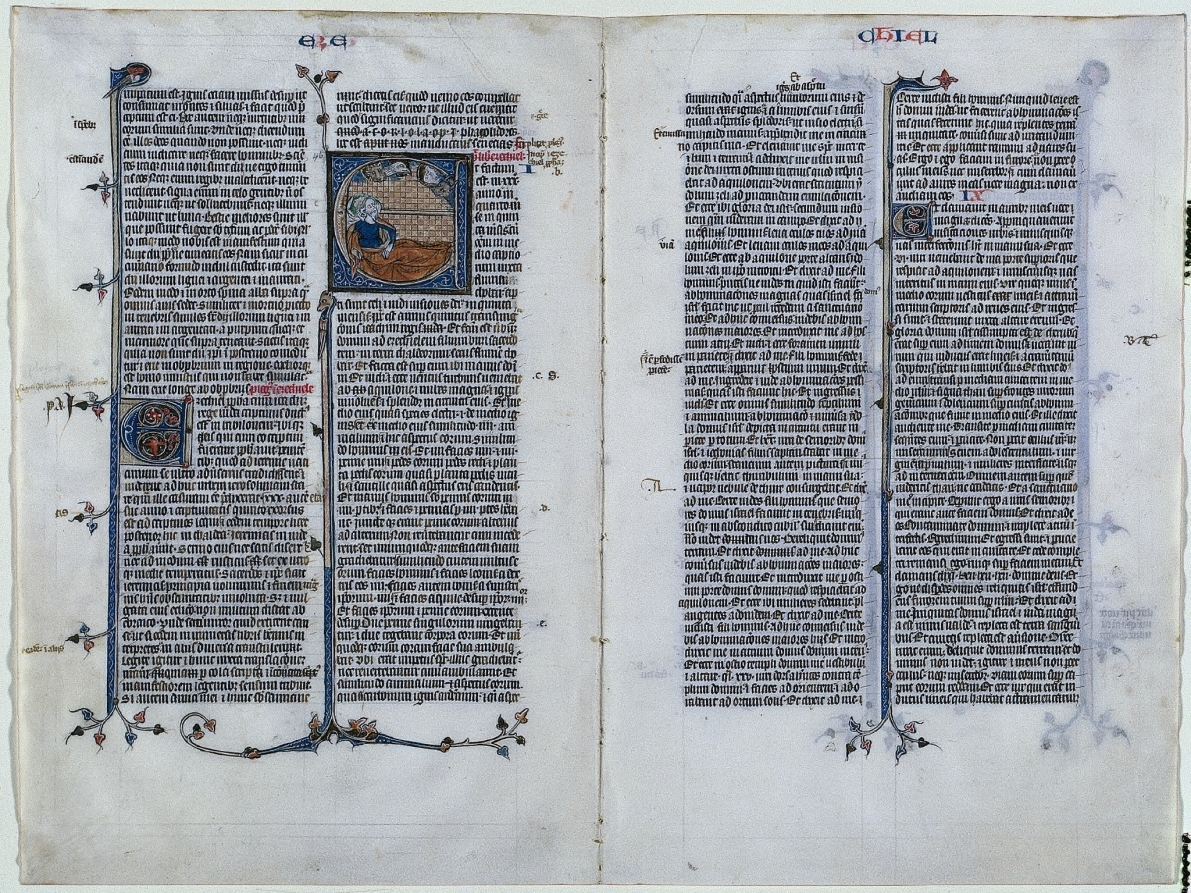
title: Bifolium from a Bible: Initial E[t factum est] with Ezekiel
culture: France, Paris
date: c. 1290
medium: ink, tempera, and gold on vellum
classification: Manuscript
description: This large initial E on the left page introduces the Book of Ezekiel. The prophet is represented in the midst of his apocalyptic visions. Ezekiel's call to prophecy began as a vision showing God enthroned among four creatures, each with four wings and the face of a man, lion, ox, and eagle, respectively. These apocalyptic beasts recur in the Book of Revelation and were developed by the medieval Church into symbols of the Evangelists: Matthew, Mark, Luke, and John. Since medieval manuscripts were not paginated, this large initial provided a clear visual cue for the reader to help locate the text of Ezekiel within the manuscript.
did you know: This bifolium was likely once part of a Carthusian Bible; the initials in the margin are part of a unique reading system used by Carthusian monks.